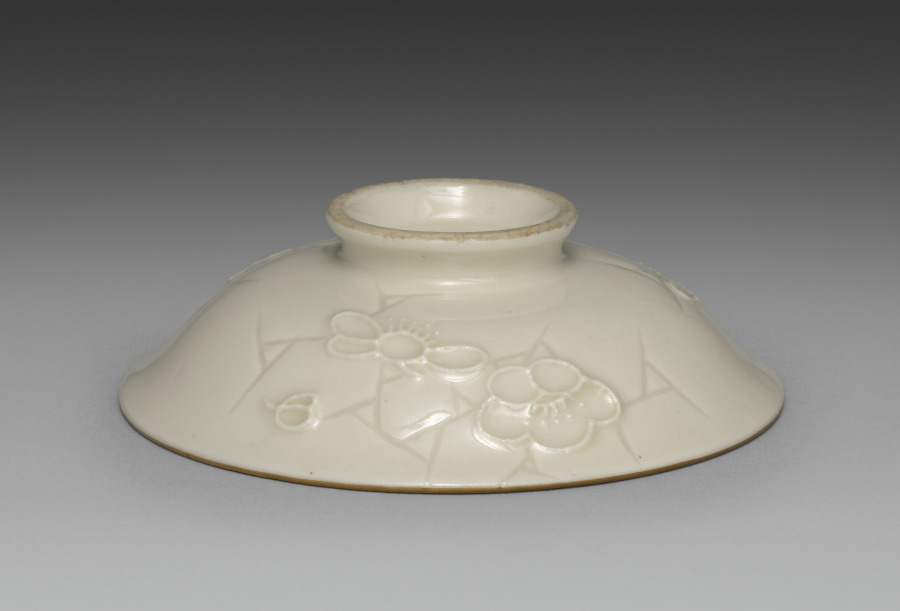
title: Cover for a Bowl from Dining Set with Plum Blossoms and Cracked-Ice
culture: Japan, Meiji period (1868–1912)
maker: Seifū Yohei II (Japanese, 1844–1878)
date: c. 1875–78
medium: Porcelain with molded designs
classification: Ceramic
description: Each item in this set has a delicate low-relief design of flowering plum branches over scattered, intersecting lines meant to resemble the cracked-ice surface of a frozen body of water and is signed on the base in gold pigment. While Yohei II produced many fine works in underglaze blue, like those produced by Kiyomizu Shichibei, he also made works in quite different styles later in his career, from the early 1870 s. In 1873, he was appointed purveyor to the Industrial Center of Kyoto Prefecture, a designation associated with Kyoto’s efforts to reach an international market through the port of Kobe; and from 1875 until his death, he was involved in national-level projects to present Japanese ceramics across the world. It was during this period that Yohei III was apprenticed to Yohei II, and it has been suggested that this set may in fact be an early example of Yohei III’s work, which he signed with his teacher’s name. Decorated with flowers resembling Japanese textile motifs, the set calls to mind the design of Yohei II’s pair of vases with plum blossoms in the Victoria and Albert Museum. Here, the elaborate trees created for a formal public exhibition setting have been translated into the approachable blossoms of the genteel domestic environment. While the designs are consistent across the pieces, each raised flower petal and pistil and each incised line in the ice was done by hand, so the cups, bowls, and dishes are similar yet unique. The bottoms of two boxes once identified the set’s owner, but the information has been deliberately obscured with black ink. However, inscriptions still visible appear to indicate two occasions, once at the end of July 1886 , and once again in June 1916 , when parts of the set were requested from Hokura in Niigata Prefecture. The location corresponds to a neighborhood in the present-day city of Jōetsu. The surname Tsuji 辻 also appears on a paper tag affixed to one of the box cloths. Future research may possibly reveal more about their provenance. A vase by Yohei III in a private collection combines the formal grandeur of the Yohei II vases in the Victoria and Albert Museum with the gentler design of this dining set, placing flowering plum trees against soft, scalloped-edge clouds resembling those in golden screens.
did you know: The dining wares have a creamy white coloration that the four boxes containing them identify as Korean in style.